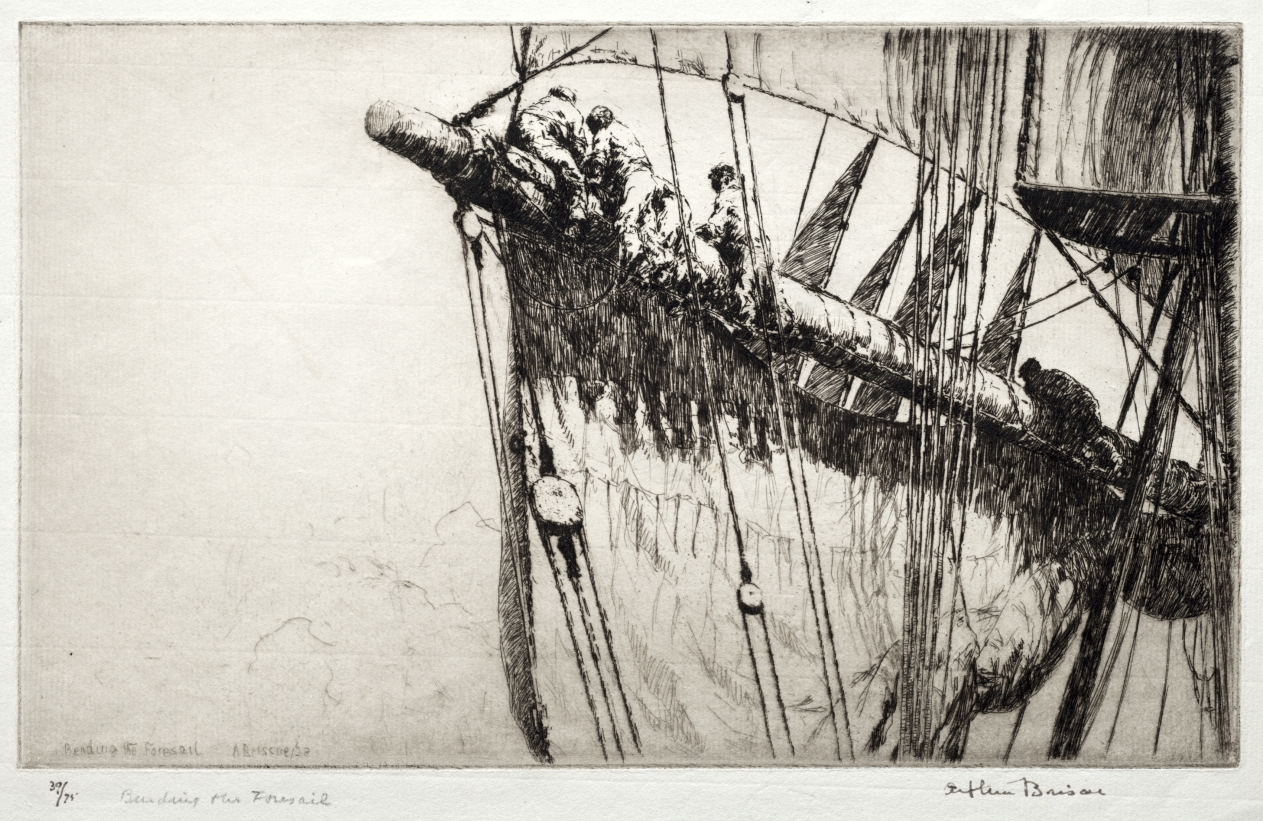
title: Bending the Foresail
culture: England, 20th century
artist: Arthur John Trevor Briscoe (British, 1873–1943)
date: 1928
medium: etching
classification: Print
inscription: Lower margin, in brown ink: 39/75 Arthur Briscoe In graphite: Bending the Foresail